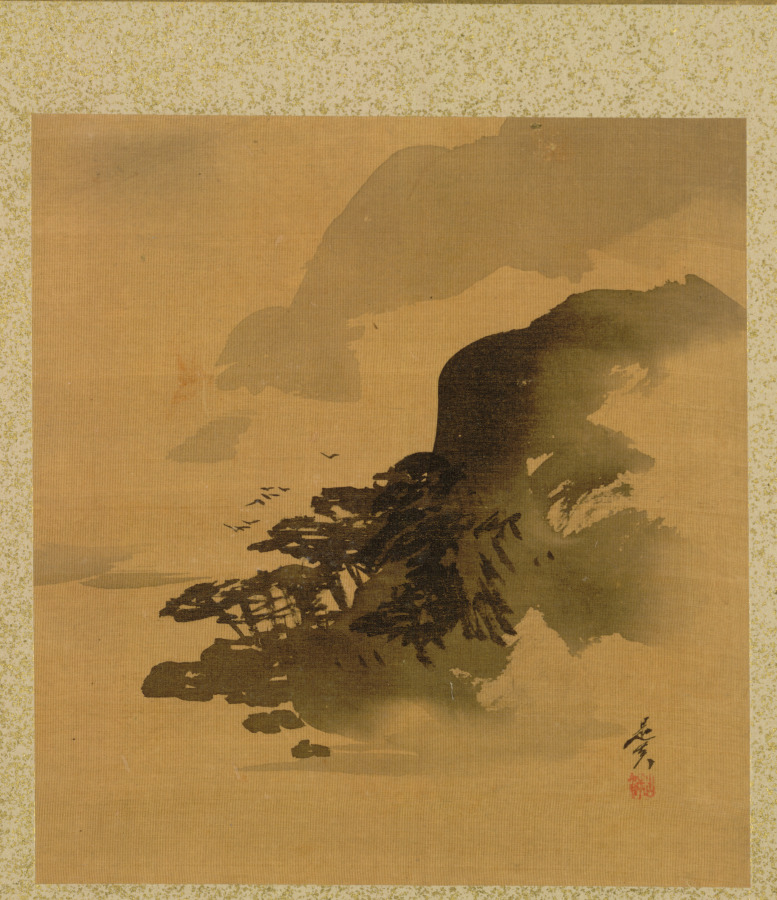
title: Shoreline with Birds from Album of Paintings by the Venerable Zeshin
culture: Japan, Edo period (1615–1868)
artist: Shibata Zeshin (Japanese, 1807–1891)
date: 1847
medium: leaf in accordion-style album; ink, color, and gold on silk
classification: Bound Volume